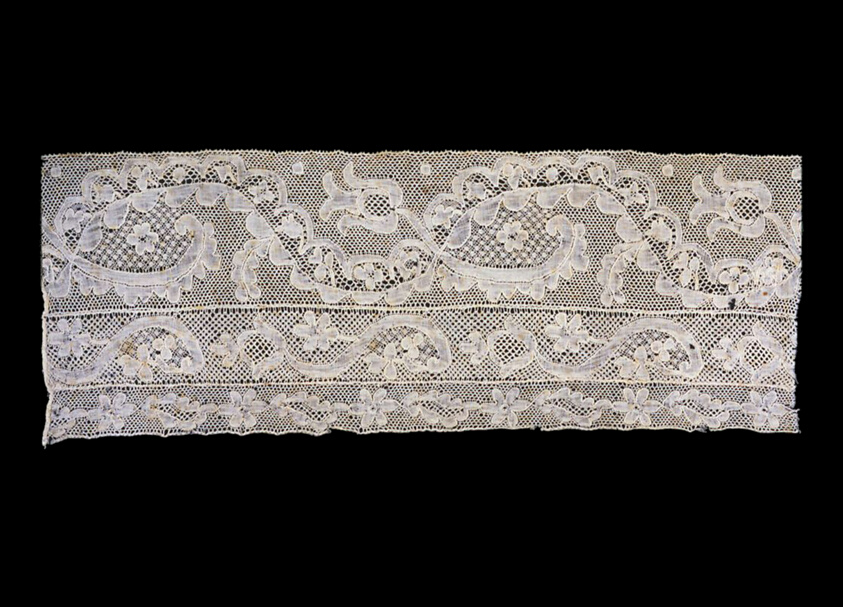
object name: Textile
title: Fragment (Three Joined Strips)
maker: Belgium, Flanders, probably Antwerp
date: 1750/75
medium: Cotton and linen, bobbin straight lace of a type known as "Mechlin" with a kat stitch and Rose mesh ground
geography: Flanders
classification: textile; lace - bobbin; lace